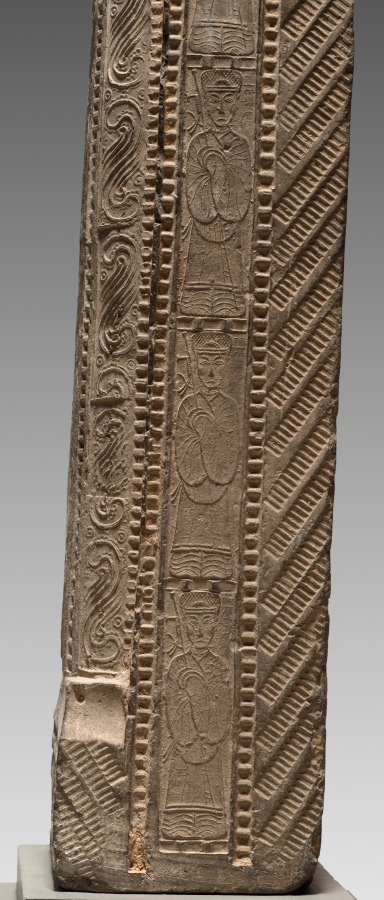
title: Hollow Tile: Column from Tomb-Chamber Doorway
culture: China, Han dynasty (202 BCE–220 CE)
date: 100–200 CE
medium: earthenware, die-stamped relief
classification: Ceramic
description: Striding tigers (top), racing horsemen (right column), and reverent officials (left column) are stamped into the surface of this underground portal to a tomb. The doorway preserves in stone the post-and-lintel structure, a basic element of Chinese wooden architecture. By the first century AD, a revolution in Chinese tomb construction and furnishing had taken place. Tombs lined with decorated bricks and tiles replace the earlier tombs constructed with only rammed earth-walls. Ceramic surrogates or models of stoves, houses, servants, and pets filled these more durable chambers, symbolically extending the creature comforts of this world into the world after death.